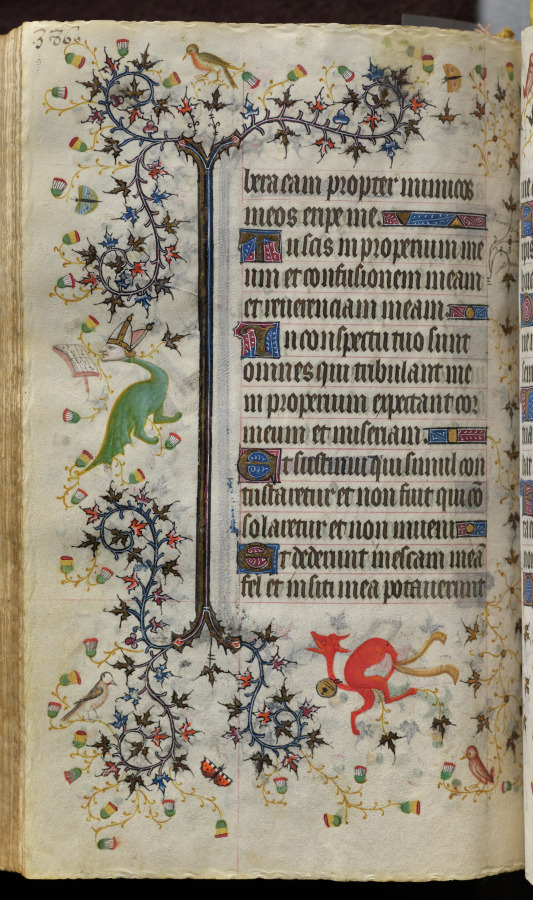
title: Hours of Charles the Noble, King of Navarre (1361-1425): fol. 188v, Text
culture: France, Paris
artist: Master of the Brussels Initials and Associates (French)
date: c. 1405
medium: ink, tempera, and gold on vellum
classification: Bound Volume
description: This precious volume was obviously highly prized by its owner, the French-born King of Navarre, who had his coat of arms painted on no less than twenty folios. Rather than directly commissioning this manuscript from a specific workshop, it seems that Charles the Noble acquired his book of hours -- perhaps ready-made for the luxury market -- while on a trip to Paris in 1404-05. A collaborative effort, six painting styles are evidenced within the pages of this codex, those of two Italians, two Frenchmen, and two Netherlanders. The painter who was responsible for the planning and decoration of the book, and who produced seventeen of the large miniatures, was a Bolognese artist known as the Master of the Brussels Initials. His principal assistant, responsible for most of the borders, was a Florentine who signed his name "Zecho" da Firenze on folio 208 verso.